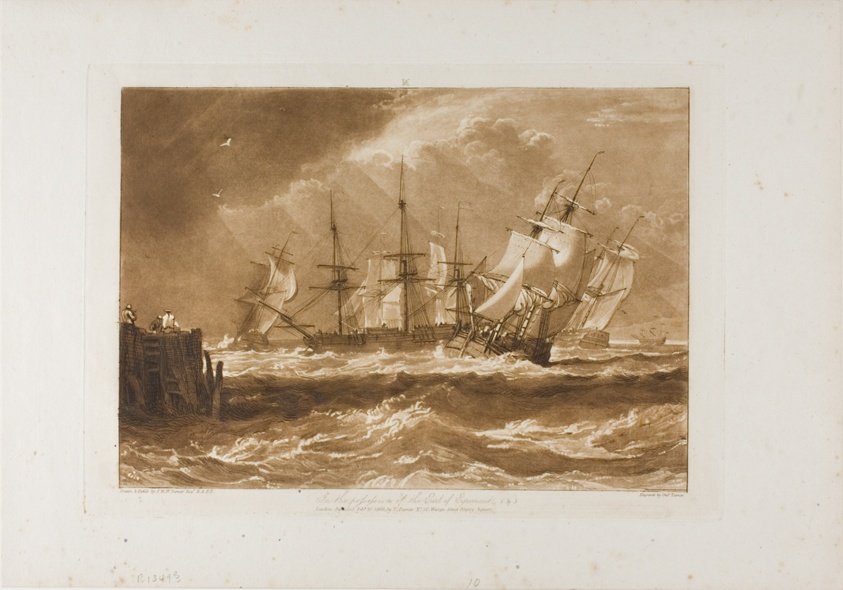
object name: Print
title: Ships in a Breeze, plate 10 from Liber Studiorum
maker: Joseph Mallord William Turner (English, 1775-1851); Engraved by Charles Turner (English, 1773-1857)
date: published February 20, 1808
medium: Etching and engraving in brown on ivory laid paper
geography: England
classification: etching; print; prints and drawing